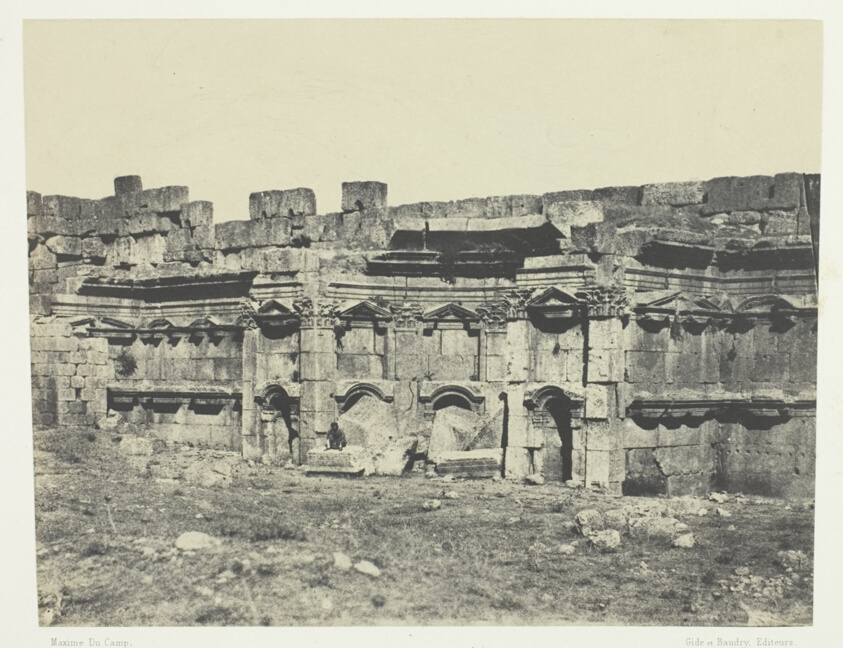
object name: Photograph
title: Baalbeck, Intérieur De L'Enceinte Des Temples Du Soleil Et De Jupiter; Syrie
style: 19th century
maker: Maxime Du Camp (French, 1822–1894)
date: 1849/51, printed 1852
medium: Salted paper print, plate 119 from the album "Egypte, Nubie, Palestine et Syrie" (1852)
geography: France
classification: salted paper print; photographic process; photography; photograph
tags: Collected by Hugh Edwards, Egypte, Nubie, Palestine et Syrie